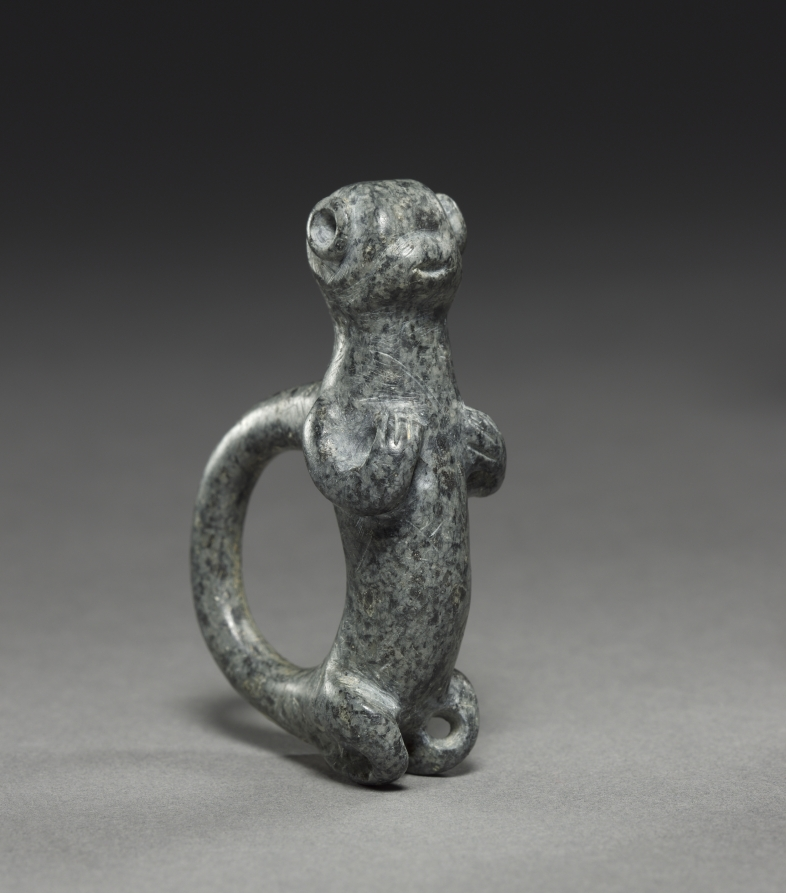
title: Monkey Pendant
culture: Panama, International Style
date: c. 400–900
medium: stone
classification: Sculpture